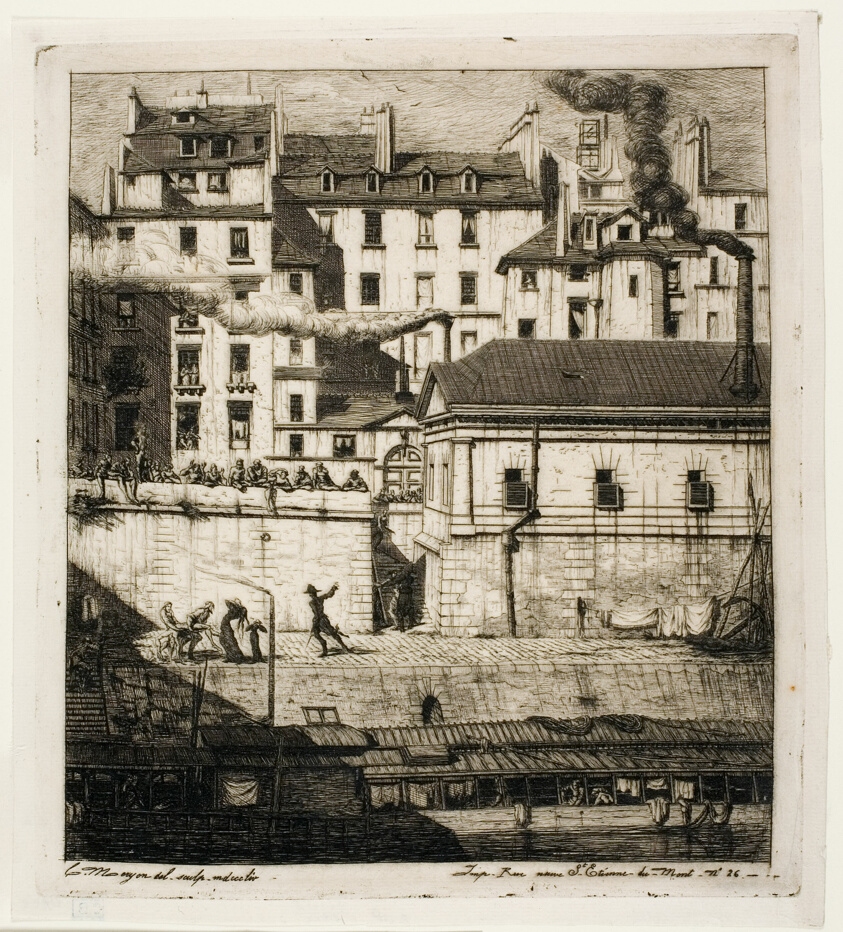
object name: Print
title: The Mortuary, Paris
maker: Charles Meryon (French, 1821-1868)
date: 1854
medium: Etching and drypoint on ivory laid paper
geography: France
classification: etching; print; prints and drawing